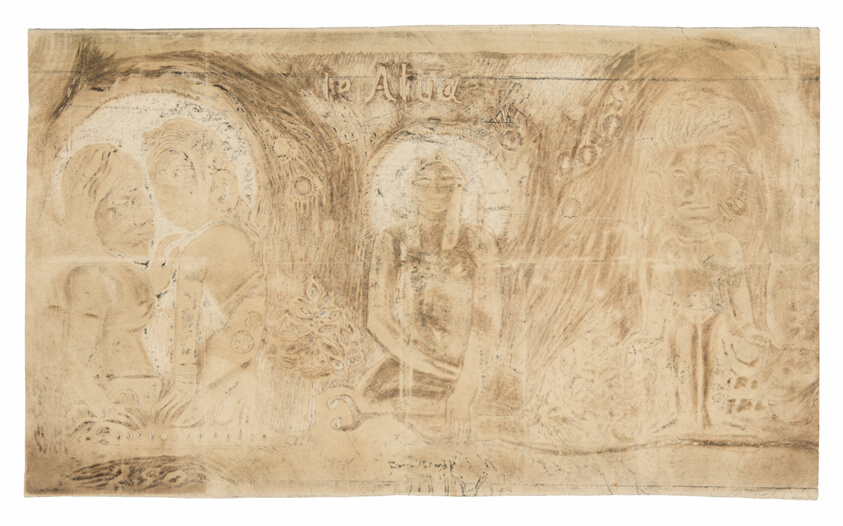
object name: Print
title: Te atua (The God), from the Noa Noa Suite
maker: Paul Gauguin (French, 1848-1903)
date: 1893/94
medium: Wood-block print in residual brown and black inks on ivory wove paper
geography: France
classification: woodcut; print; prints and drawing